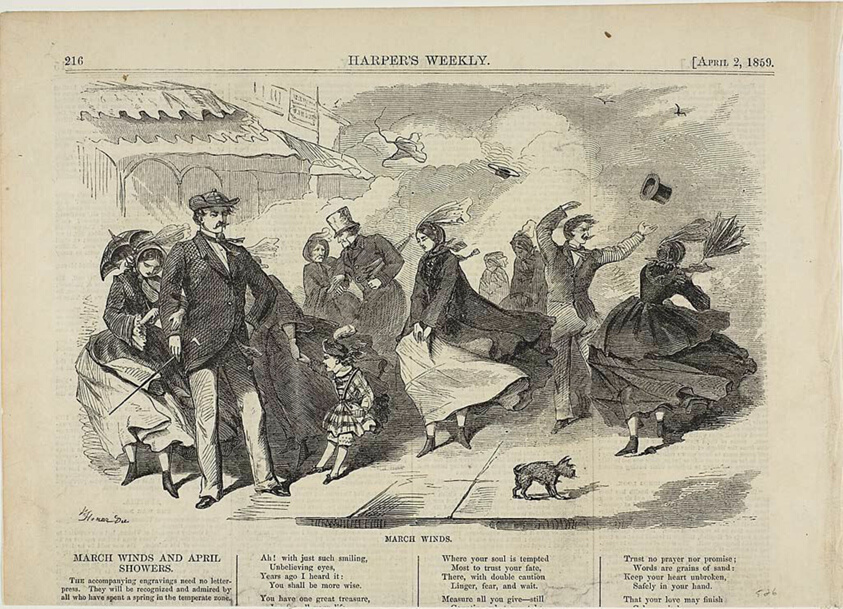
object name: Print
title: March Winds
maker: Winslow Homer (American, 1836-1910); published by Harper's Weekly (American, 1857-1916)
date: published April 2, 1859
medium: Wood engraving on paper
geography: United States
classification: wood engraving; print; prints and drawing